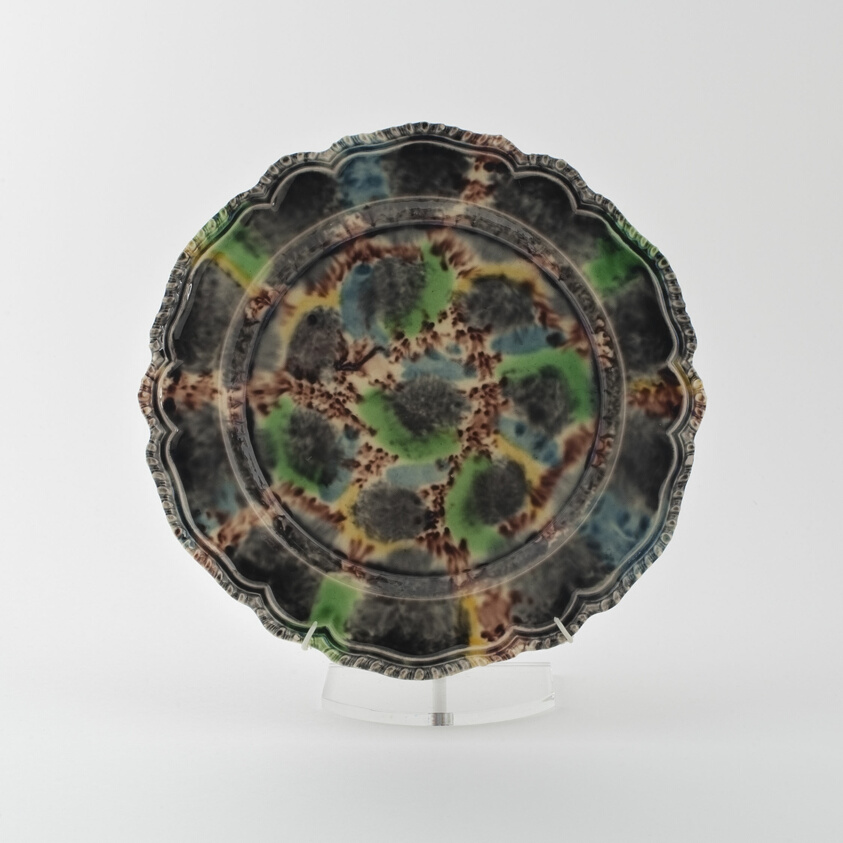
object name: Ceramics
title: Plate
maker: England, Staffordshire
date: 1750/65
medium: Lead-glazed earthenware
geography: Staffordshire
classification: plate (general, dish); dish (vessel); european decorative arts; ceramics